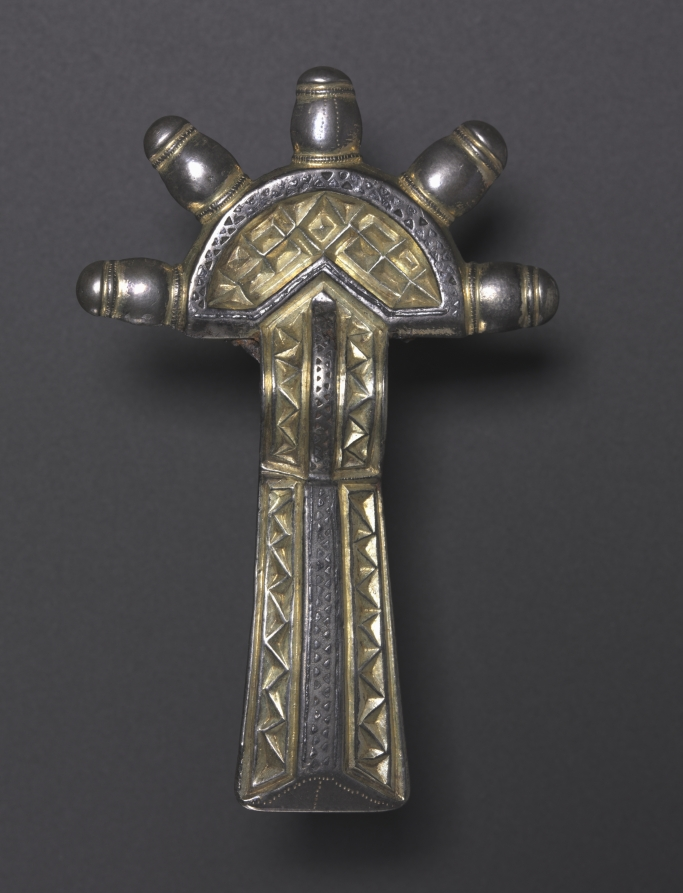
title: Bow Fibulae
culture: Alemannic, 6th century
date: 500–550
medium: silver gilt and niello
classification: Jewelry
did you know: This type of fibula, or pin, is also called a "digitized fibula" because of its radiating knobs that resemble fingers.